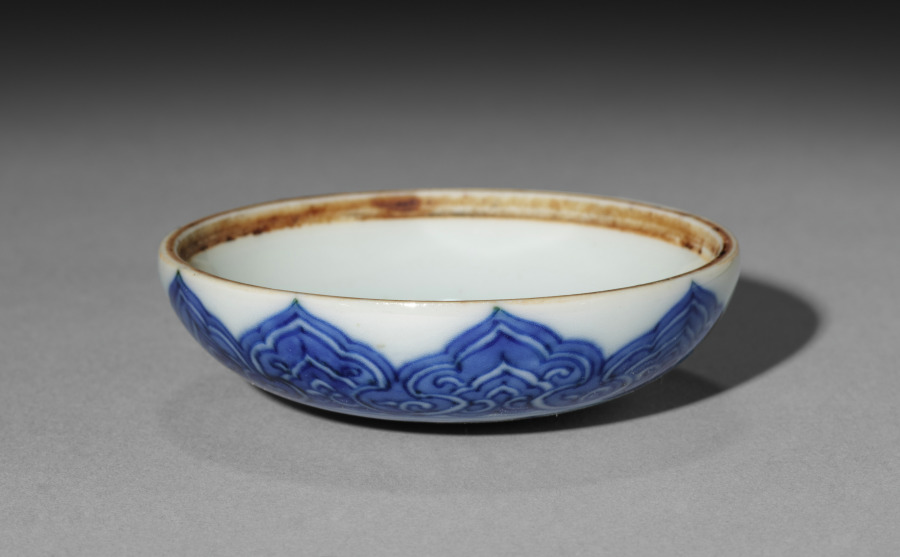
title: Round Covered Box with Medallions (lid)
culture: China, Jiangxi province, Jingdezhen kilns, Ming dynasty (1368-1644), Jiajing mark and reign (1522-66)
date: 1522–66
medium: porcelain with underglaze blue decoration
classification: Ceramic